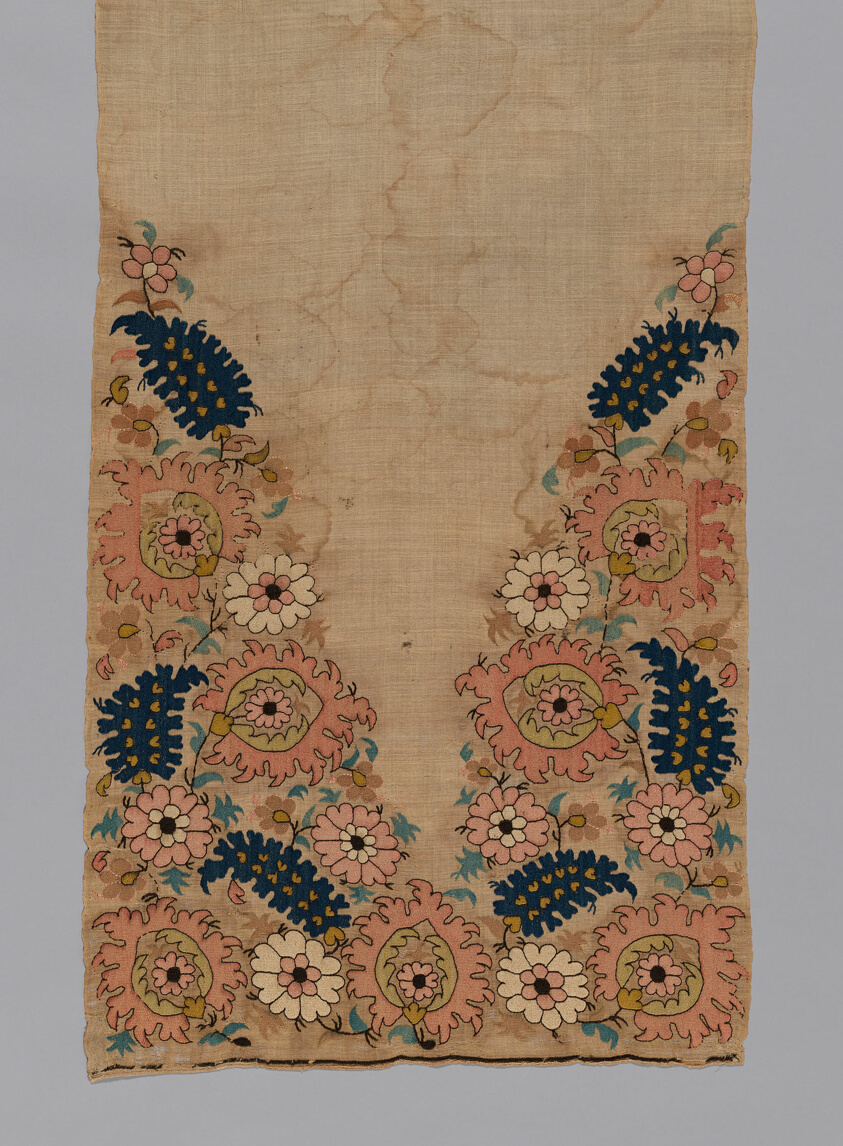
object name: Costume and Accessories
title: Scarf or Cover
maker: Turkey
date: 1701/25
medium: Kerchief, embroidered in rose spray pattern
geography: Turkey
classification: textile; needlework (visual works); weaving; costume